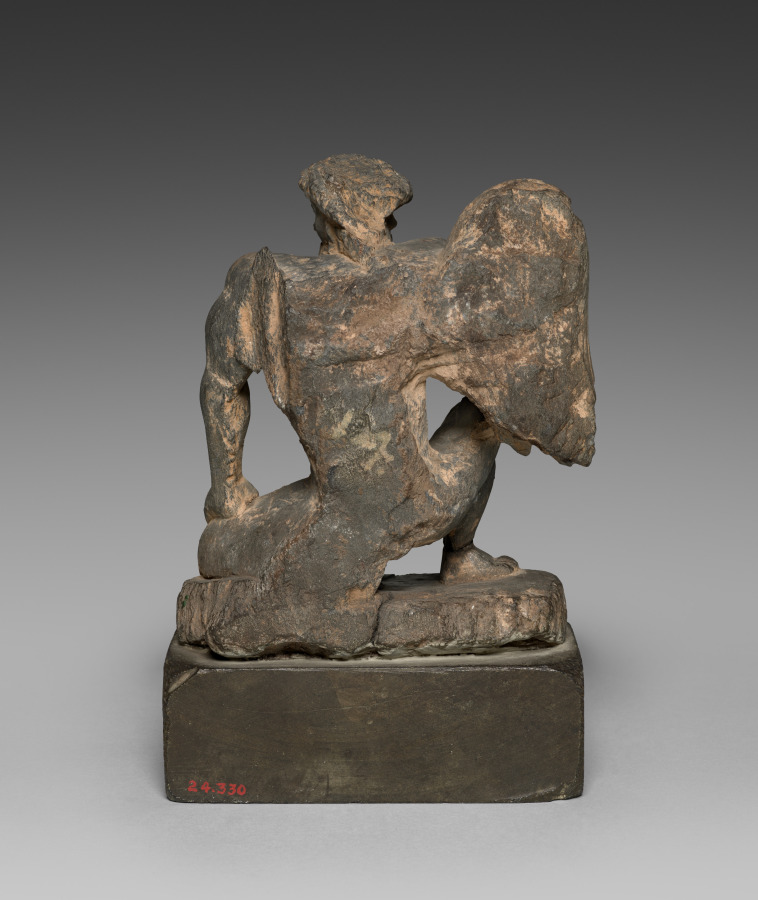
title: Winged Atlas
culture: Pakistan, Gandhara, Kushan period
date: c. 100s–200s CE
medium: gray schist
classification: Sculpture